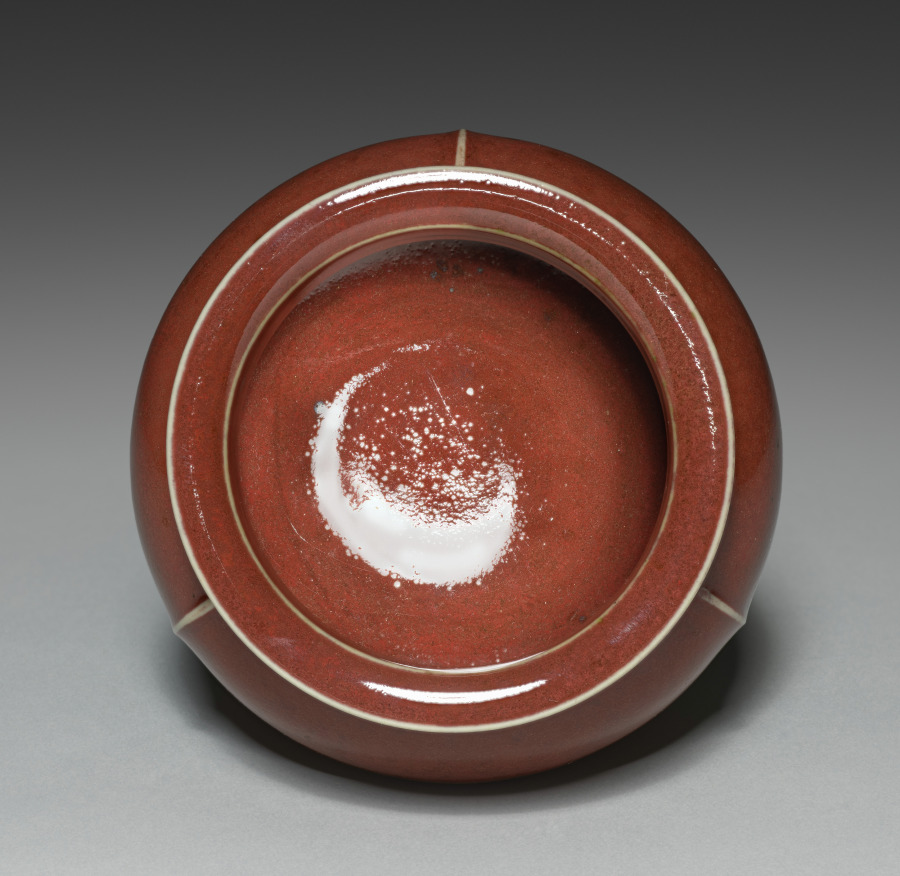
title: Incense Burner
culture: Japan, Meiji period (1868–1912)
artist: Seifū Yohei III (Japanese, 1851–1914)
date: 1893–97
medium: Porcelain with molded design, crimson glaze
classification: Ceramic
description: Seifū Yohei III made incense burners in a wide variety of designs and styles. The glaze is described as “crimson glaze” (kōyū); it is also dappled with dark spots of varied opacity and tiny pores throughout, which gives the container a rich, textured effect. Yohei III had the silver lids produced outside the studio by metalwork specialists. For this tripod, they decorated the lid with a variety of flowers.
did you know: This tripod incense burner has linear molded decorations that run around the base of the collar and down the legs.